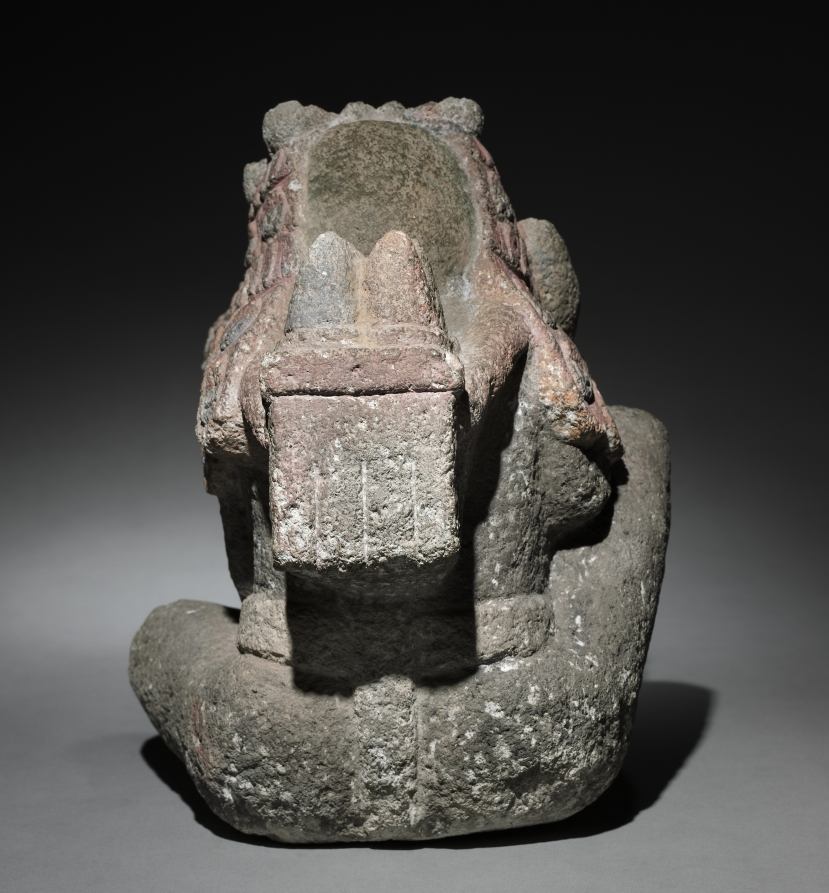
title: Seated Male Carrying Maize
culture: Central Mexico, Aztec style, 13th-16th century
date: 1325–1521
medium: stone, pigment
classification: Sculpture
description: This figure probably represents an Aztec deity-either Macuilxochitl or Xochipilli-whose domain was beauty, the arts, and such pleasures as gameplaying, dancing, and sex. Both names include the Aztec word for "flower," and in one hand the figure holds a cone of flowers, perhaps the blossoming crown of a cactus. For the Aztecs, flowers signified beauty, refinement, and fertility in general and sexuality in particular. The burden of maize cobs on his back also may allude to his creative energies.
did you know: Macuilxochitl is one of five gods of excess pleasure, and the punishment that follows.